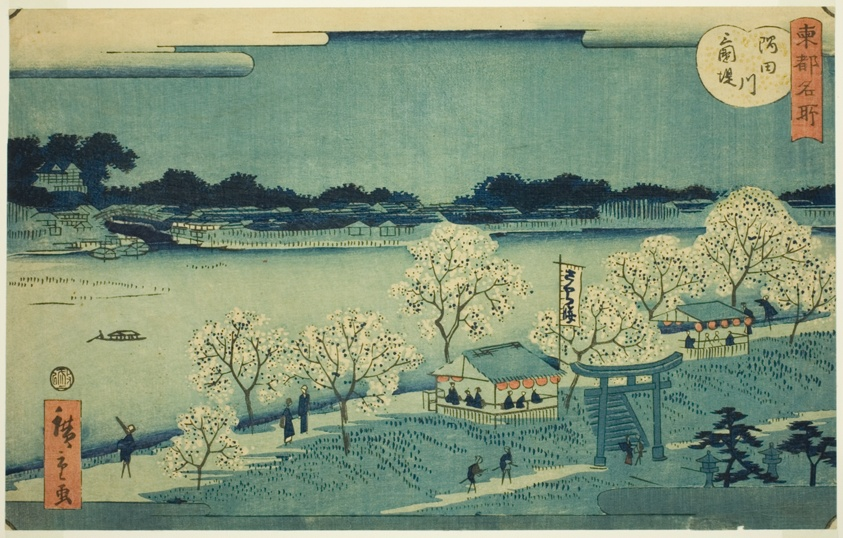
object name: Print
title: The Mimeguri Embankment on the Sumida River (Sumidagawa Mimeguri tsutsumi), from the series "Famous Places in the Eastern Capital (Toto meisho)"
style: Japanese (culture or style)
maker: Utagawa Hiroshige II (Shigenobu) (Japanese, 1826–1869)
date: 1862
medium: Color woodblock print; oban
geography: Japan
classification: woodblock print; print; asian art